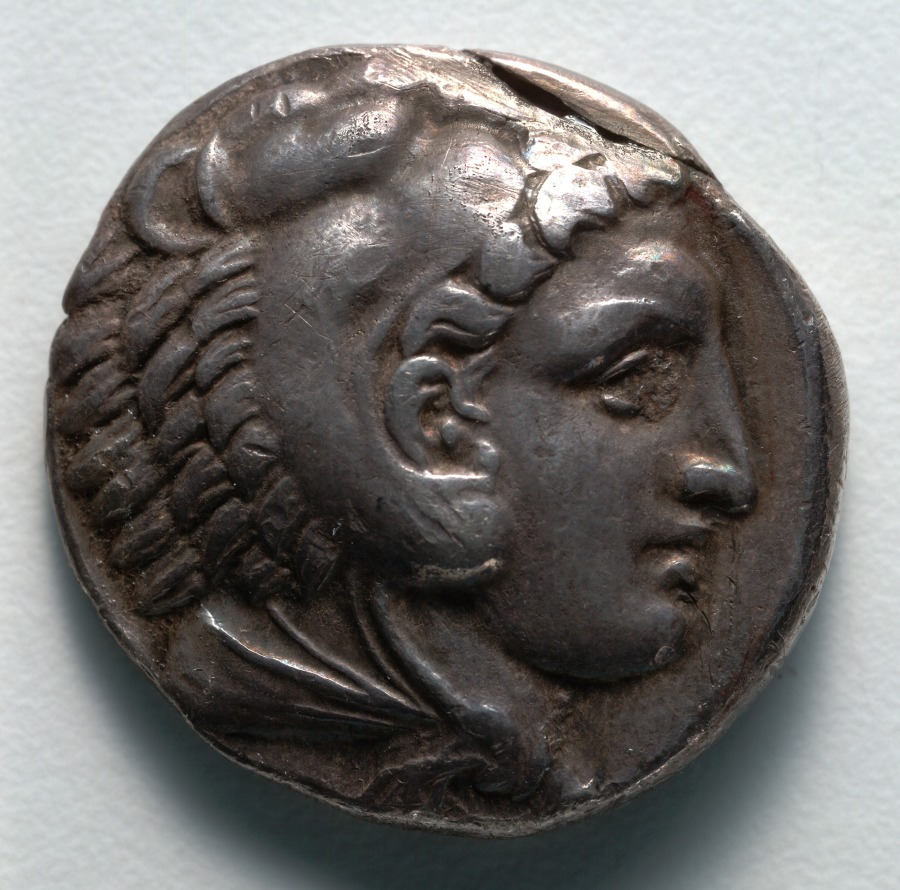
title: Tetradrachm: Head of Young Herakles (obverse); Zeus (reverse)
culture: Greek, Macedonian, minted at Amphipolis (Macedonia), reign of Alexander III [The Great]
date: 336–323 BCE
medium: silver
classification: Coins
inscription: ΑΛΕΞΑΝΔΡΟΥ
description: On this coin, the head of a youthful Herakles, wearing his lion-skin, appears on the obverse, with his father Zeus, king of the gods, seated on the reverse. For Alexander III (the Great), who claimed descent from the line of Herakles, coins like this one projected power. Thus, while their attributes (lion-skin, eagle, scepter) identify hero and god, the inscription ΑΛΕΞΑΝΔΡΟΥ (of Alexander) identifies the leader.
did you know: The Pegasos protome beside Zeus (on the reverse) indicates that this coin was minted at Amphipolis.